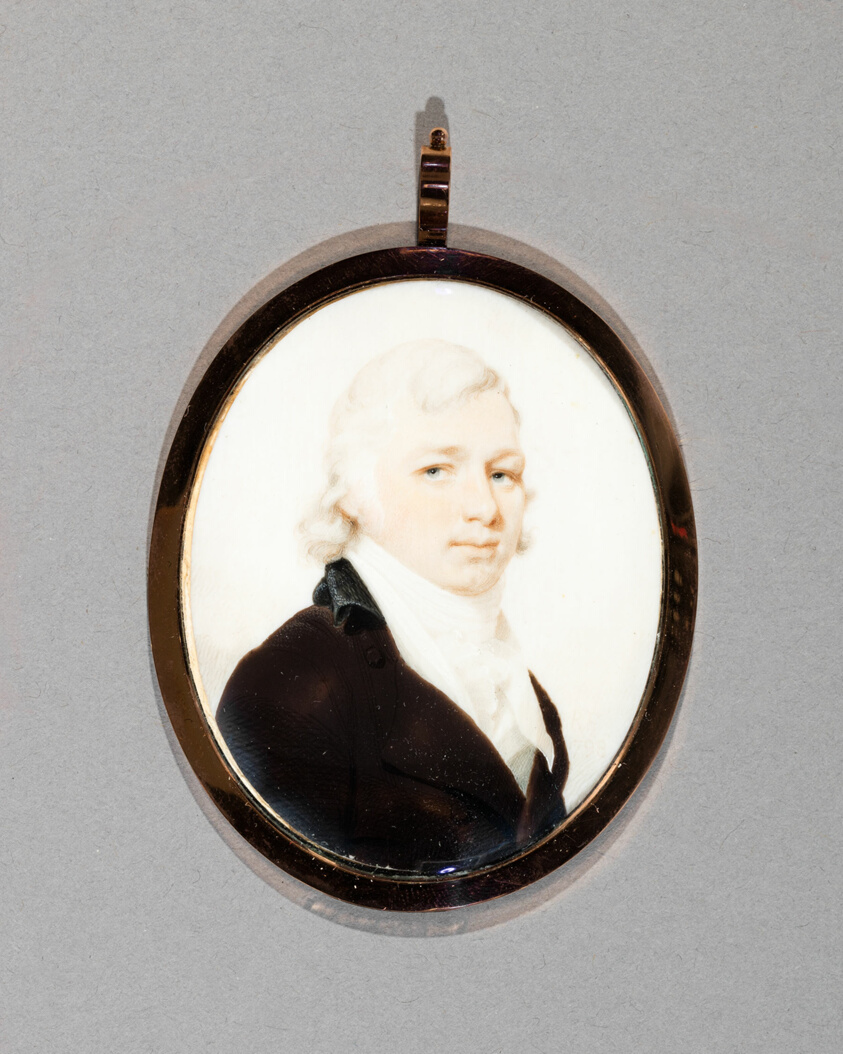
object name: Miniature Painting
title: Jonathan Henderson (1772-1833)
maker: Robert Field (American, c. 1769–1819)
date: 1798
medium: Watercolor on ivory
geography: Philadelphia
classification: miniature painting; american arts; miniature; painting